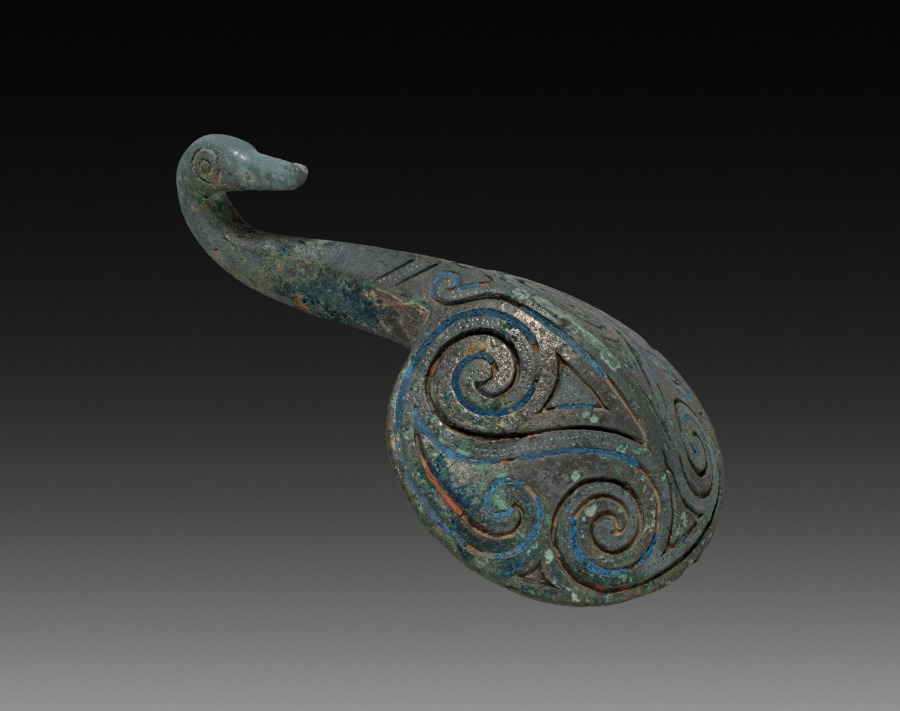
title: Belt Hook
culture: China, Eastern Zhou dynasty (770–256 BCE)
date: late 500s–early 400s BCE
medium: bronze inlaid with powdered azurite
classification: Metalwork